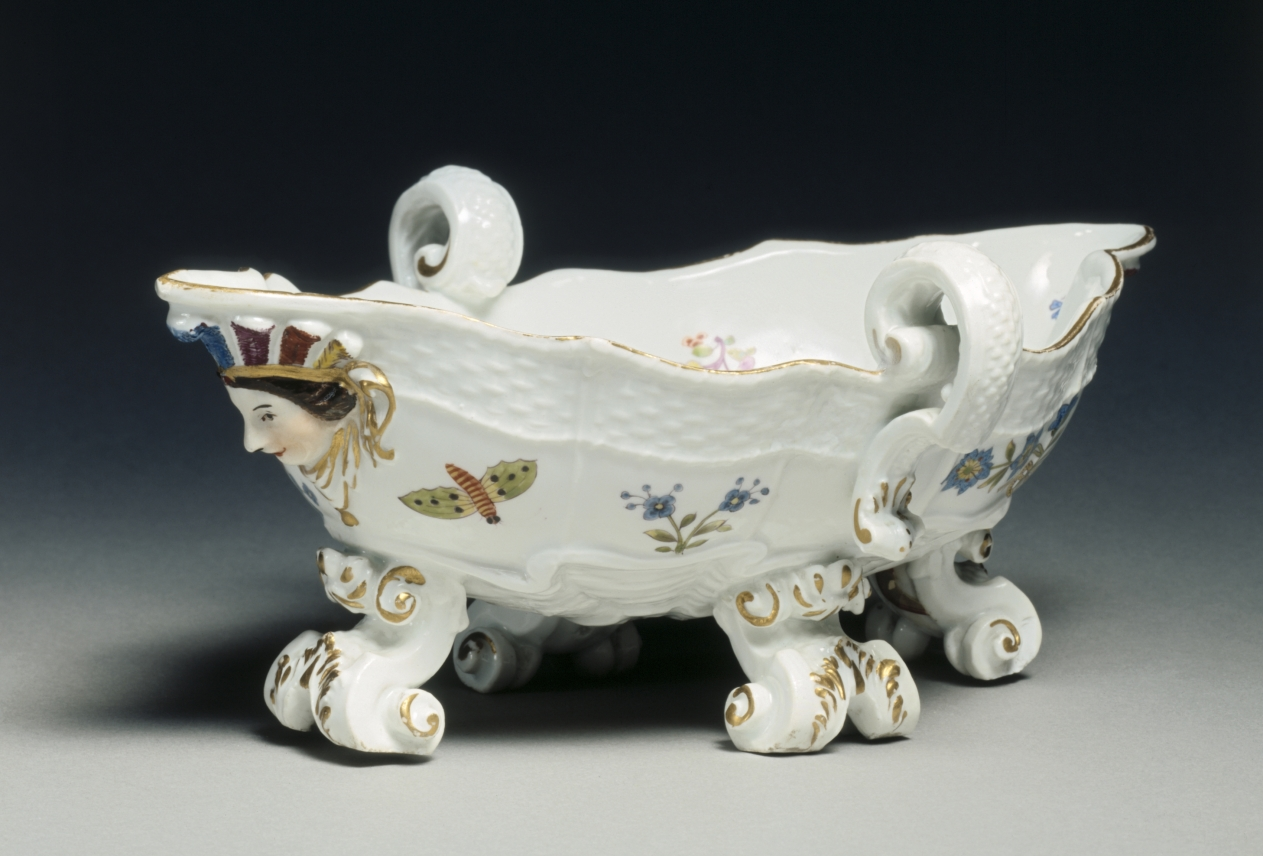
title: Sauceboat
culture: Germany, Meissen, Johann Joachim Kandler period 1735-56, 18th Century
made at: Meissen Porcelain Factory (German, est. c. 1710)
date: 1735–56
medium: porcelain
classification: Ceramic